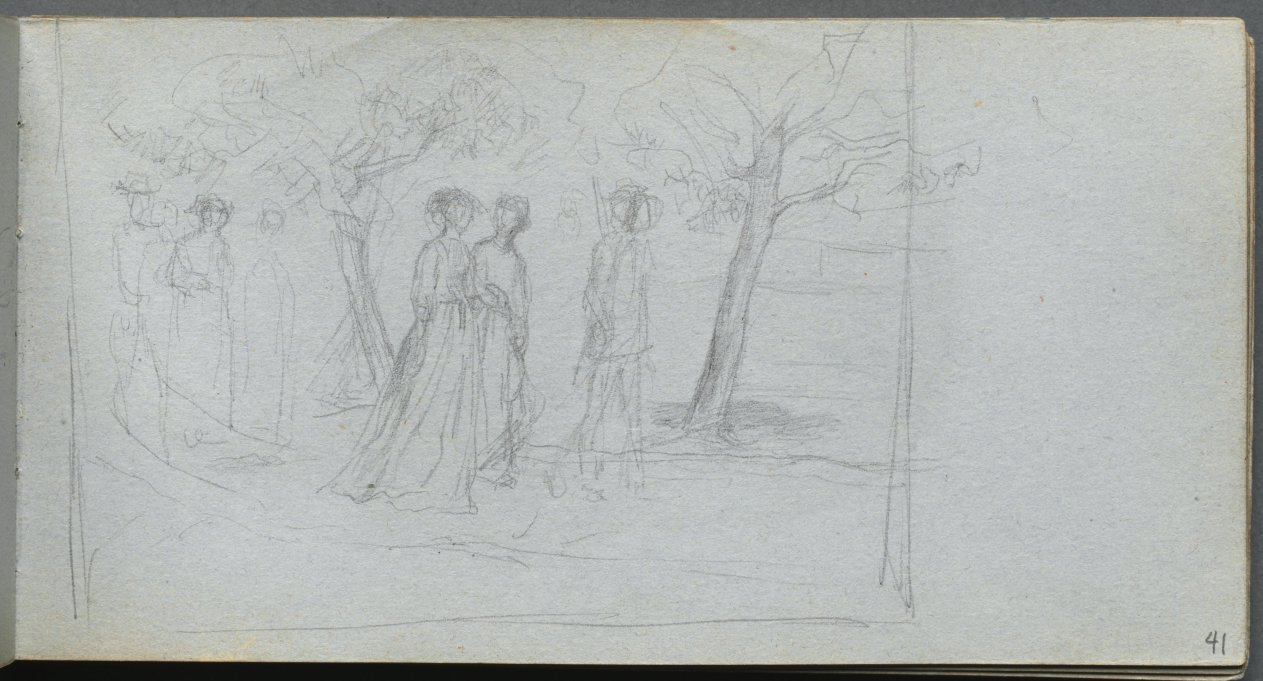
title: Sketchbook, page 41: Figures in a Landscape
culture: France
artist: Ernest Meissonier (French, 1815–1891)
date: c. 1860s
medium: graphite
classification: Bound Volume